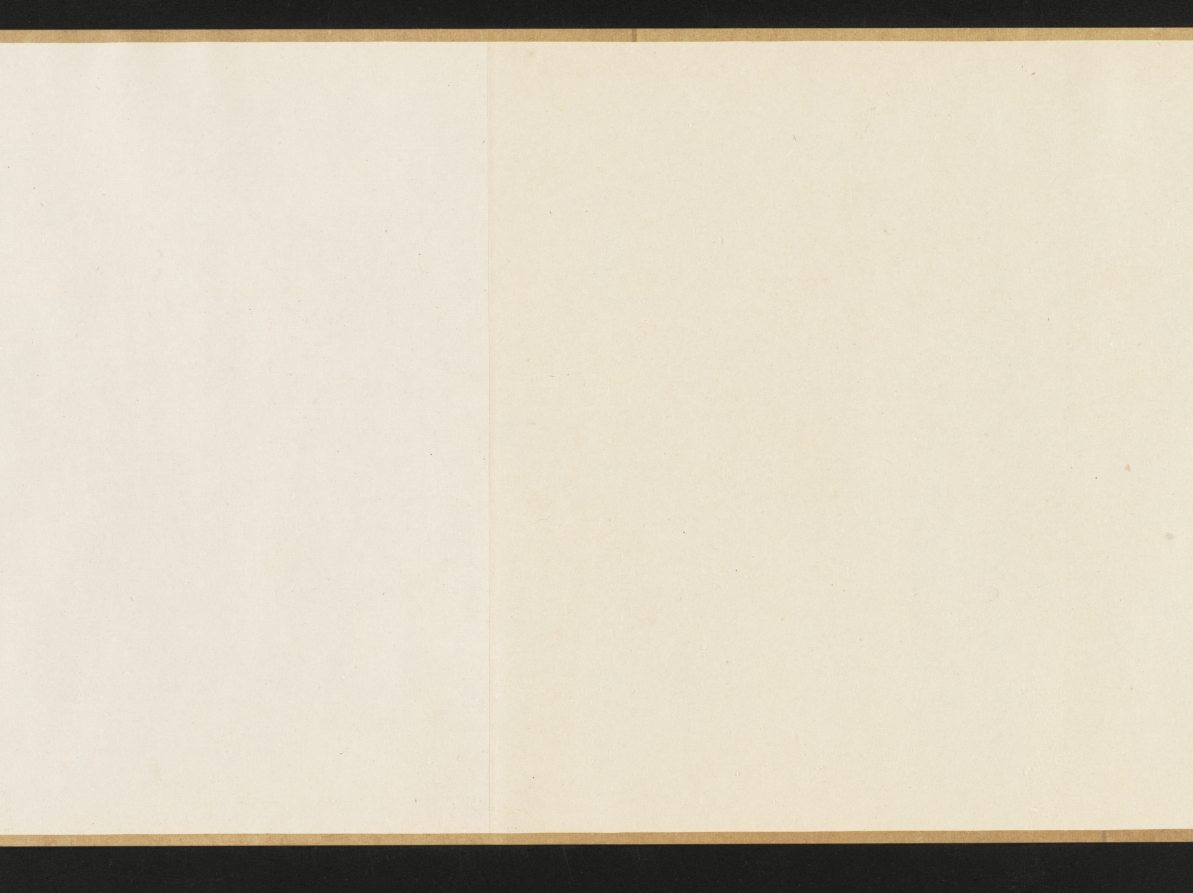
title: The Lantern Night Excursion of Zhong Kui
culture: China, Yuan dynasty (1271-1368)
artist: Yan Hui (Chinese, active 1270–1310)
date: late 1200s–early 1300s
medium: handscroll; ink and slight color on silk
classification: Painting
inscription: Artist's signature [and probable seal]: Yan Qiuyue 顏秋月 Title on frontispiece and 1 seal of Niu Shuyu 鈕樹玉 (1760–1827): Qiuyue mohuan 秋月墨幻 [Qiuyue's Ink Fantasy]. 31 additional seals: 2 of Yang Shiqi 楊士奇 (1365–1444); 2 of An Guo 安國 (1481–1534); 8 of Xiang Yuanbian 項元汴 (1525–1590); 2 of Geng Zhaozhong 耿昭忠 (1640–1686); 4 of Pu Tung 溥侗 (1870–1952); 7 of Tan Jing 譚敬 (1911–1991); 1 of Liu Ting-chih (20th c.); 5 unidentified.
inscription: An inscription by Zizhi Shanren 紫芝山人 [probably Jiang Hui 蔣惠], dated 1389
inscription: An inscription by Wu Kuan 吳寬 (1436–1504)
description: Here, the demon queller Zhong Kui leads a nightly procession of street entertainers with bare, muscular bodies and demonic faces. Some wear shabby clothes, and all perform stunts and tricks to astound and scare the viewer. In fact, a New Year custom in cities of southeast China had the poor, disguised as demons, process through the streets and play their tricks to clear households of evil spirits and welcome the spring. From right to left, a demonic figure leads the procession and beats a drum; another lifts a large rock; one stands on his hands trying to drink; one balances a jar on his elbow; three hold and wield weapons; one carries a folded chair covered by a cow’s skin; another holds Zhong Kui’s qin (zither), books, brush, and inkstone. At the end of the scroll, two figures offer a cup and bottle of wine to Zhong Kui, who lifts his hand in command.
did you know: Zhong Kui was an ancient ghostbuster.